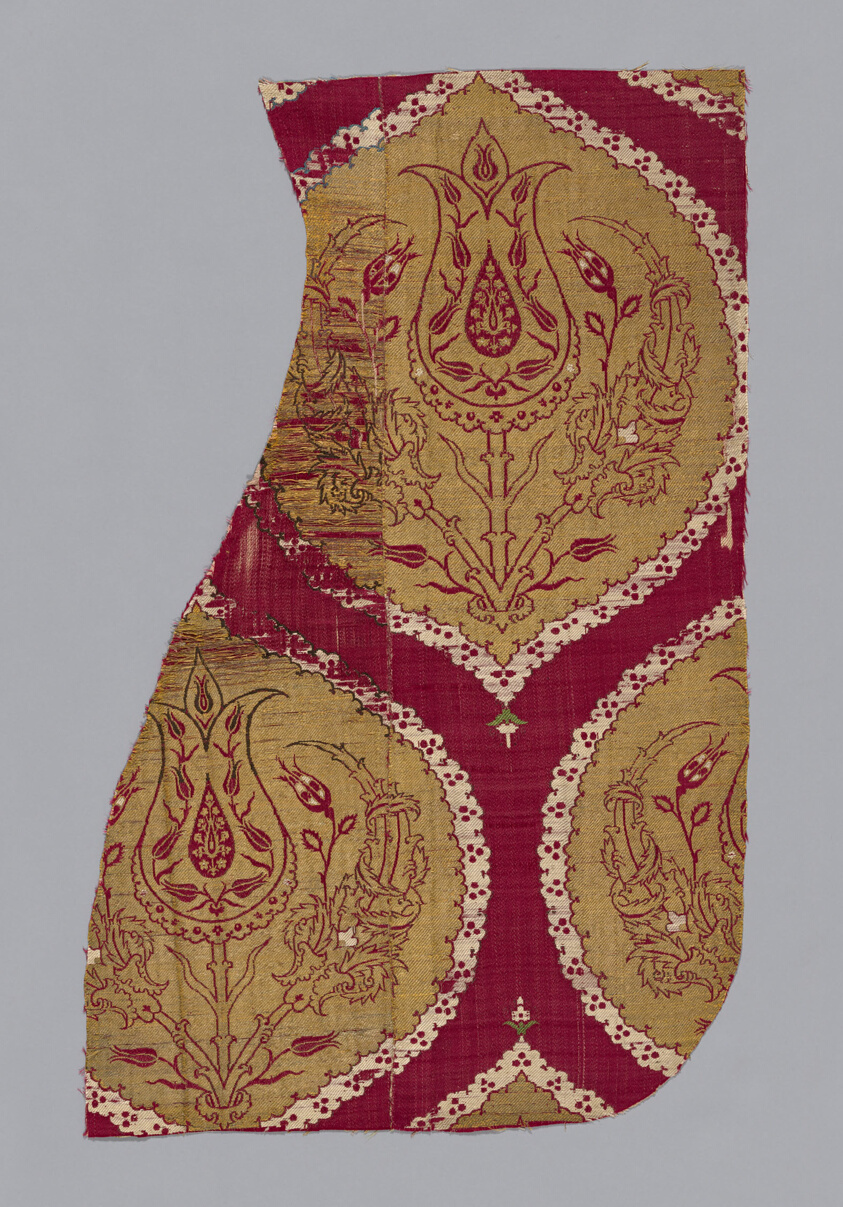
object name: Textile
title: Fragment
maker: Turkey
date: 1550/75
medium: Silk and gilt-metal-strip-wrapped silk, warp-float faced 4:1 satin weave with weft-float faced 1:3 'Z' twill interlacings of secondary binding warps, self-patterning complementary ground wefts, and supplementary brocading wefts; two fragments pieced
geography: Turkey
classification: textile; weaving